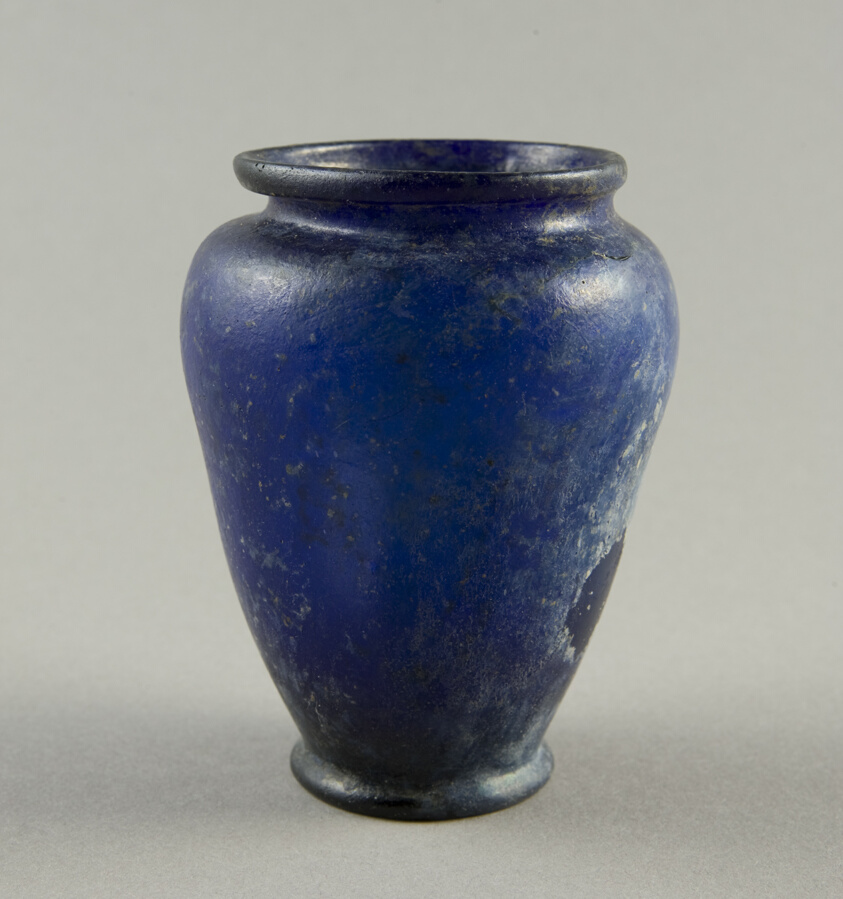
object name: Vessel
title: Vase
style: ancient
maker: Ancient Mediterranean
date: 1st-2nd century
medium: Glass, blown technique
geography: Mediterranean Region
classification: glass; vessel; ancient art